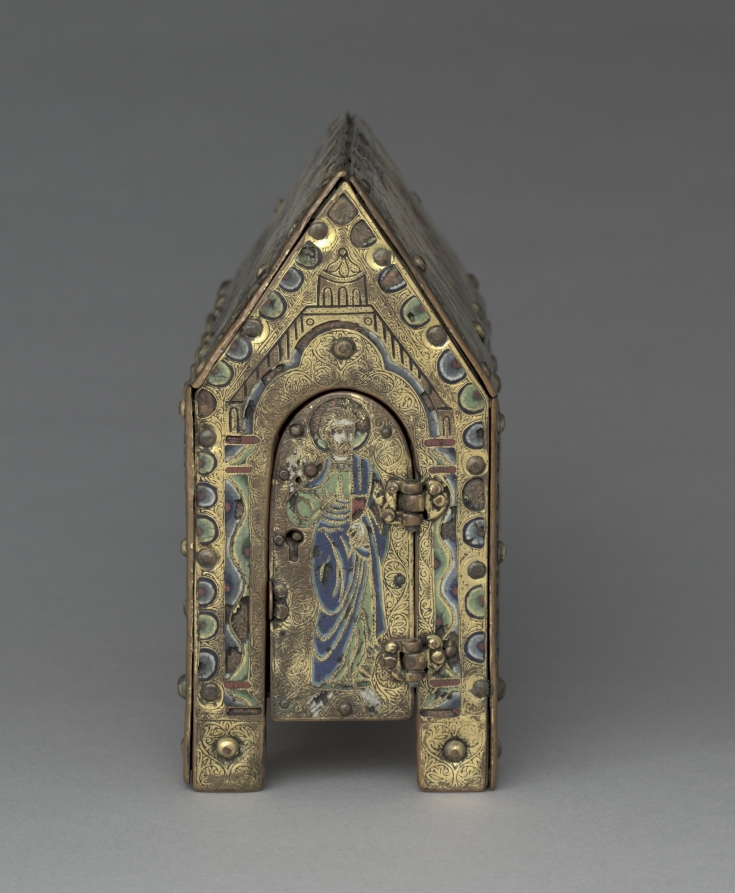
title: Chasse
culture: France, Limousin, Limoges, Gothic period, first half of 13th century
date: 1200–1250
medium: copper: gilded, engraved, chased; champlevé enamel; wood core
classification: Enamel